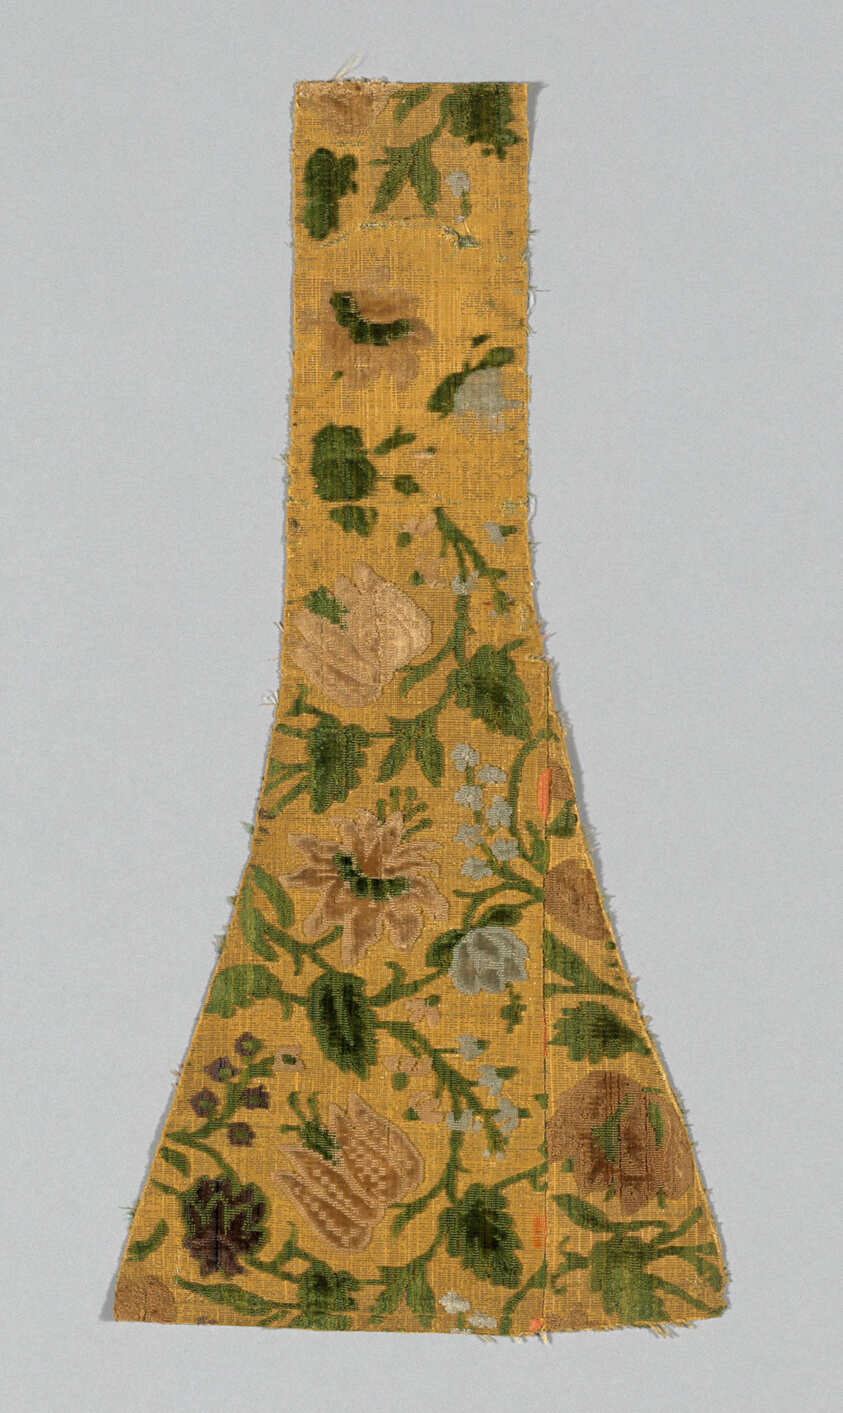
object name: Textile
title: Fragment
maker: Italy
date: 1650/1700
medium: Cisele voided cloth velvet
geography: Italy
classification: textile; weaving - velvet; weaving